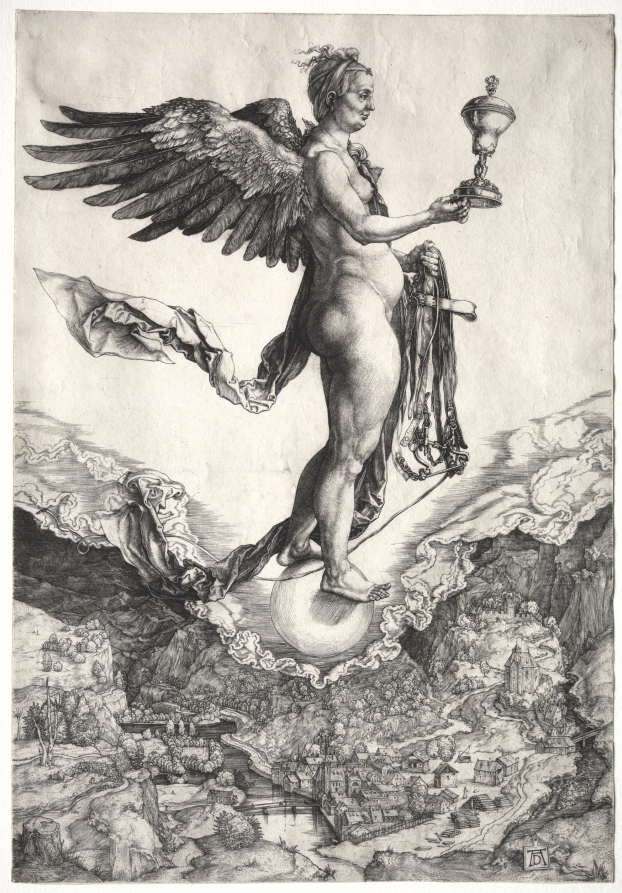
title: Nemesis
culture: Germany, early 16th Century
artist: Albrecht Dürer (German, 1471–1528)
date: c. 1501–02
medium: engraving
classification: Print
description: According to the Latin poem that inspired this engraving, Nemesis, the Greek goddess of retribution, had the “power to crush the arrogant minds and triumphs of men and to confound their too ambitious plans.” Ready to dispense judgment, Nemesis hovers formidably above the clouds that separate her from the insignificant town below. As in the poem, here Nemesis has her traditional attributes—a bridle for punishment and a goblet for reward—but Dürer conflated her with Fortuna, the goddess of fortune, who balances on a sphere to symbolize the unpredictable, topsy-turvy nature of fate.